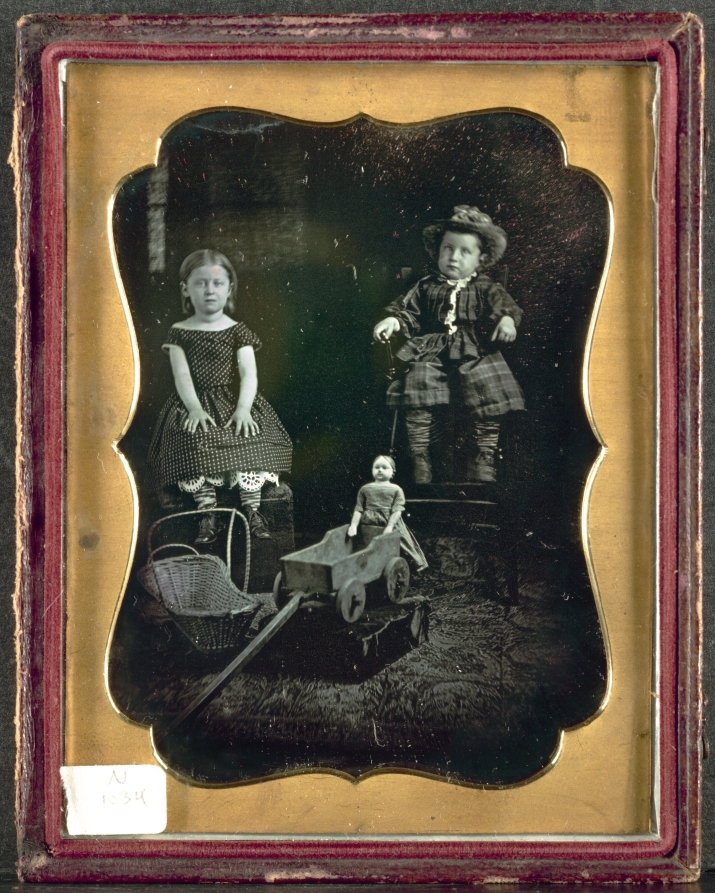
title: Two Children with Toys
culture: America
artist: Unidentified Photographer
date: c. 1855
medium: daguerreotype, quarter-plate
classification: Photograph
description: Children have always been particularly cherished subjects for photography. Portraits were made to preserve the memory of their stages of growth and, in an age when long-distance travel was rare, to share with faraway relatives. And, for a sadder reason: in 1840 an estimated one-third of children died before age five. Photography offered grieving parents the opportunity to immortalize their children’s features. This tragic genre of photographs, later called “post-mortems,” often depicts the children in fine clothing, laying down with eyes shut, as if merely napping.